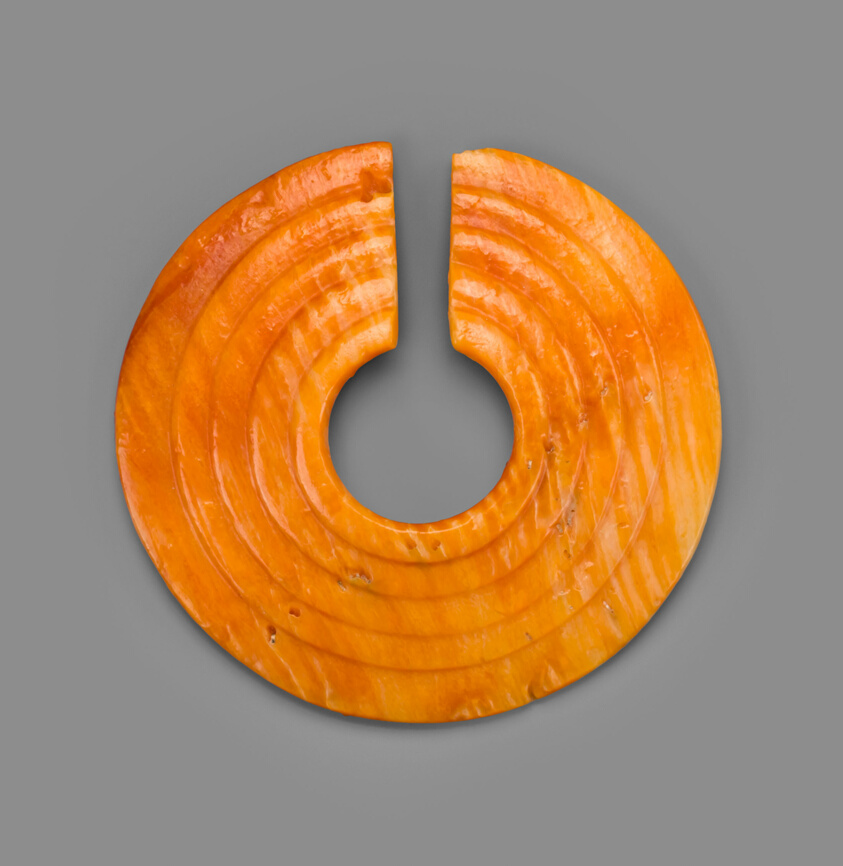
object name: Costume and Accessories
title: Circular Nose Ornament Incised with Concentric Bands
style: coclé, Pre-Columbian, americas, lower central america, Arts of the Americas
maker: Coclé (Venado Beach, Coclé province, Panama)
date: 800–1200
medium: Spondylus shell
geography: Venado Beach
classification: jewelry; shell; art of the americas; costume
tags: geometric, costume